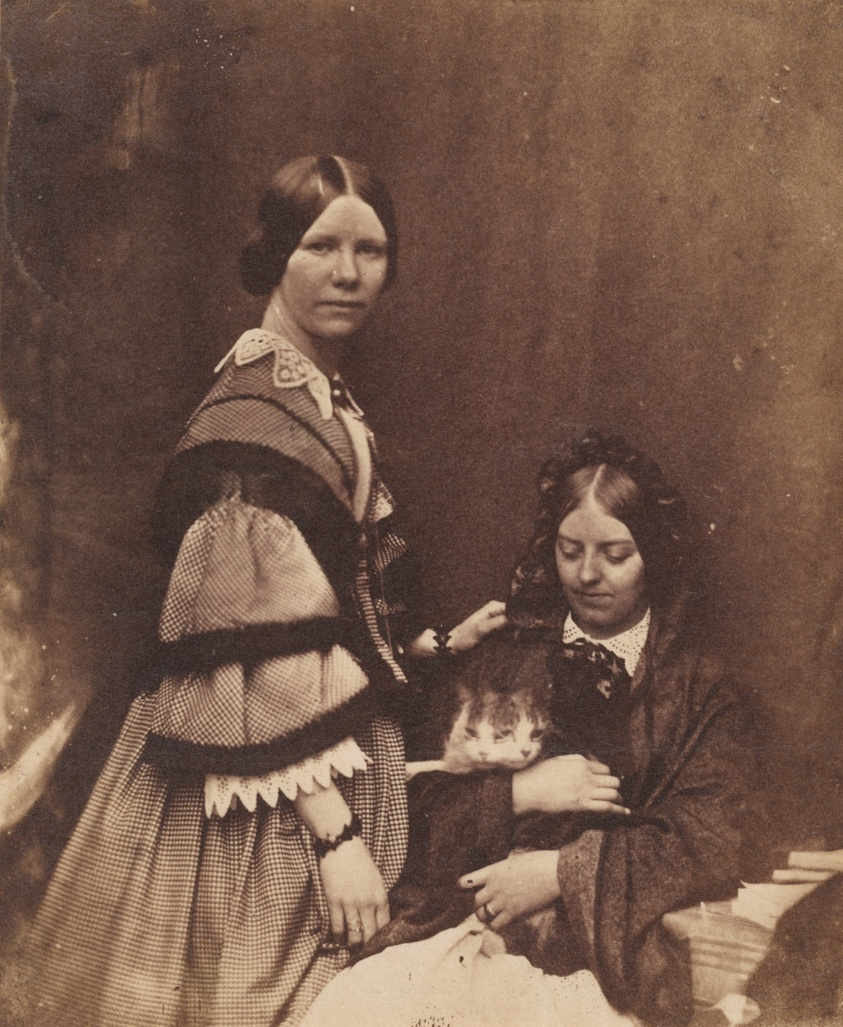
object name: Photograph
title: Mrs. Craik Holding Cat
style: 19th century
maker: Attributed to Benjamin Mulock (English, 1829–1863); English, 19th century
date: c. 1858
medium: Salted paper print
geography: England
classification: salted paper print; photographic process; photography; photograph